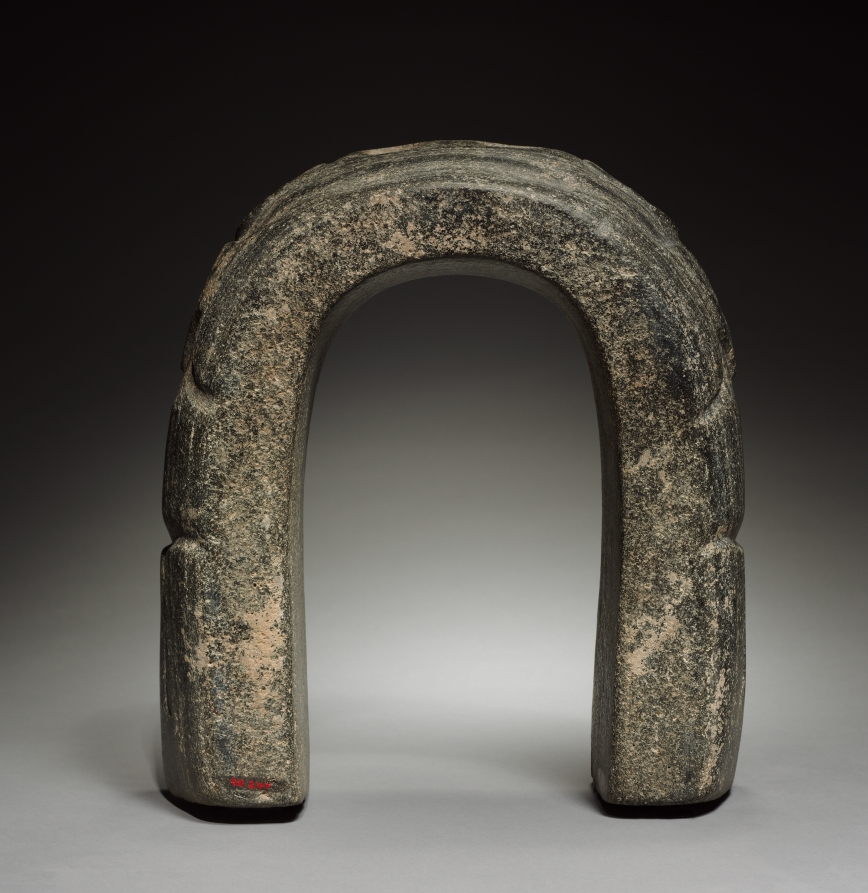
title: Unfinished Yoke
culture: Mexico, Central Veracruz, Classsic Veracruz style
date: 600–900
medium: gray stone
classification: Sculpture